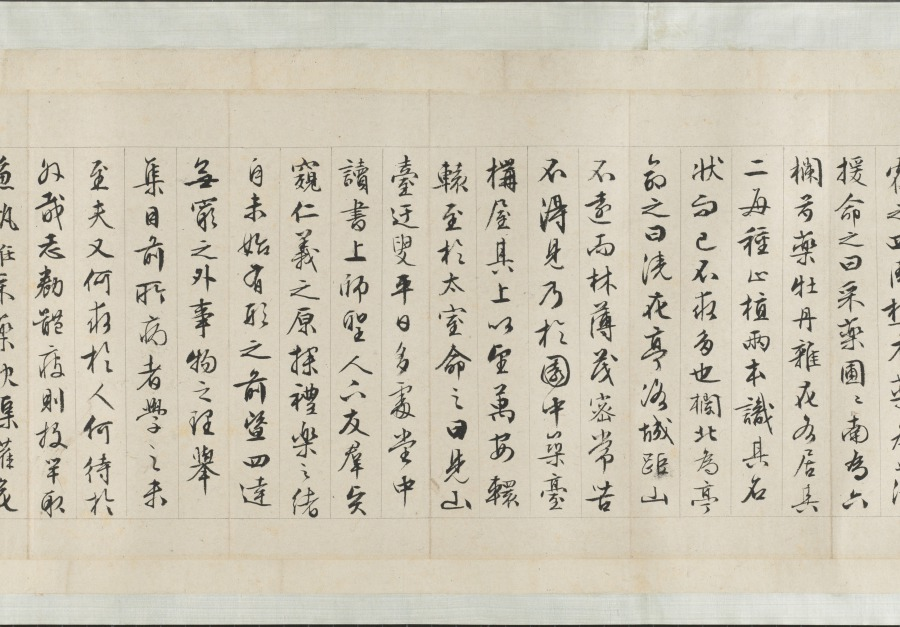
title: Garden for Solitary Enjoyment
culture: China, Ming dynasty (1368–1644)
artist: Qiu Ying (Chinese, 1494–1552)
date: 1515–52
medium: Handscroll; ink and light color on silk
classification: Painting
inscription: Accompanying text of an essay together with seven poems of Sima Guang (1019–1086) and one poem of Su Shi (1037–1101) written by Wen Zhengming (1470–1559) in 1558.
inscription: 2 colophons and 82 seals: 4 seals of Wen Zhengming 文徵明 (1470–1559); 59 seals of Xiang Yuanbian 項元汴 (1525–1590); 1 colophon, dated 1644, and 7 seals of Xiang Yukui 項禹揆 (c. late 1500s–1659); 1 colophon, dated 1880, and 2 seals of Weng Tonghe 翁同龢 (1830–1904); 2 seals of Ch'eng Chen-i (19th c.); 1 seal of Han Ch'ung (19th c.); 4 seals of Wan-go H. C. Weng 翁萬戈 (1918–2020); 3 seals unidentified.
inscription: Colophon by Xiang Yukui 項禹揆 (c. late 1500s–1659): The painting of The Garden for Self-enjoyment on the right by Shih-chou, Mr. Qiu [Qiu Ying] is in the style of Li Lung-mien. Its mood is peaceful, as if meeting the ancient gentlemen face to face among the brushes and silk; it lifts one above the sordid bustle of life. Formerly, my late father handed me this scroll which had only the painting without the written essay. I considered asking a good calligrapher to write the essay to add to it but was afraid that the quality of the writing would not match the painting. Several years later, I saw at a friend's house this essay and poems (of Ssu-ma Kuang] written by Hengshan [Wen Zhengming], once owned by my grandfather; so I spared no expense to obtain it. I rejoiced at this and said: "The divine swords are finally united. How things are pre-destined!" Now my friend Chang Kung-chao's technique for mounting [painting and calligraphy] is excellent. Therefore by daring to take them out and join them together, I can preserve this beautiful story of singular reunion. Xiang Yukui recorded at Hai-yeh-t'ang [hall] two days before New Year's Eve in the jiasheng year of the Chongzhen era [1644]. trans. LYSL/HK/WKH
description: Garden of Solitary Enjoyment refers to a site built in 1073 by the statesman Sima Guang (1019–1086) after he had retired to Luoyang, Henan province. Every spring, visitors would flock to his garden. Each of its seven structures references a historic figure. Sima wrote: I channel streams [like Du Mu], to water flowers [like Bai Juyi], or trim bamboo [like Wang Huizhi]. . . . I know of no joy between heaven and earth that could take its place. Qiu Ying’s painting, created after an 11th-century version of the same theme, must have appealed to garden owners of the Ming dynasty, since it became the template for numerous Suzhou workshop copies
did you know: Sima Guang completed his monumental survey of Chinese history, Zizhi tongjian, in the garden depicted in this painting.